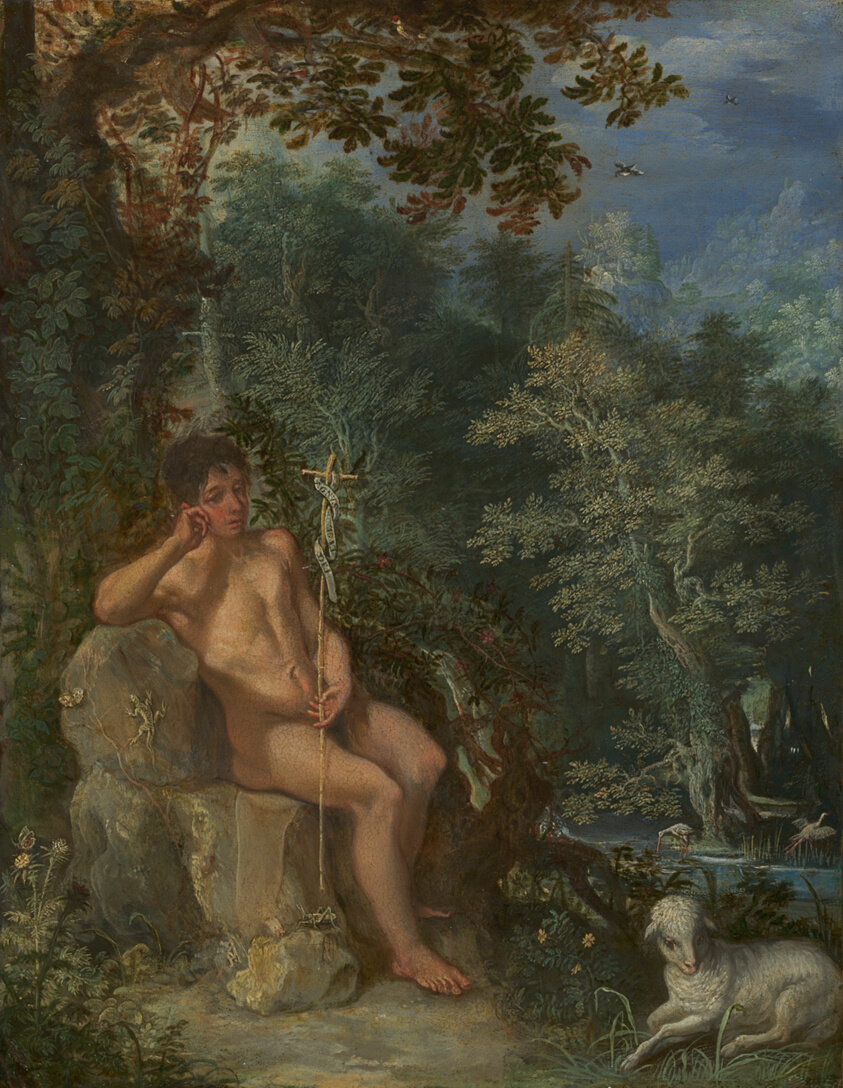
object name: Painting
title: Saint John the Baptist in the Wilderness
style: 17th Century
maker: Adam Elsheimer (German, 1578–1610)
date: c. 1605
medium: Oil on copper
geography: Germany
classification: painting; european painting; oil on copper; paint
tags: Saint John the Baptist, river, flowers, insects, lizards, butterflies, Christianity, Christian subjects, sky, bird, landscape, foliage, rocks, cross, trees, wilderness, animals